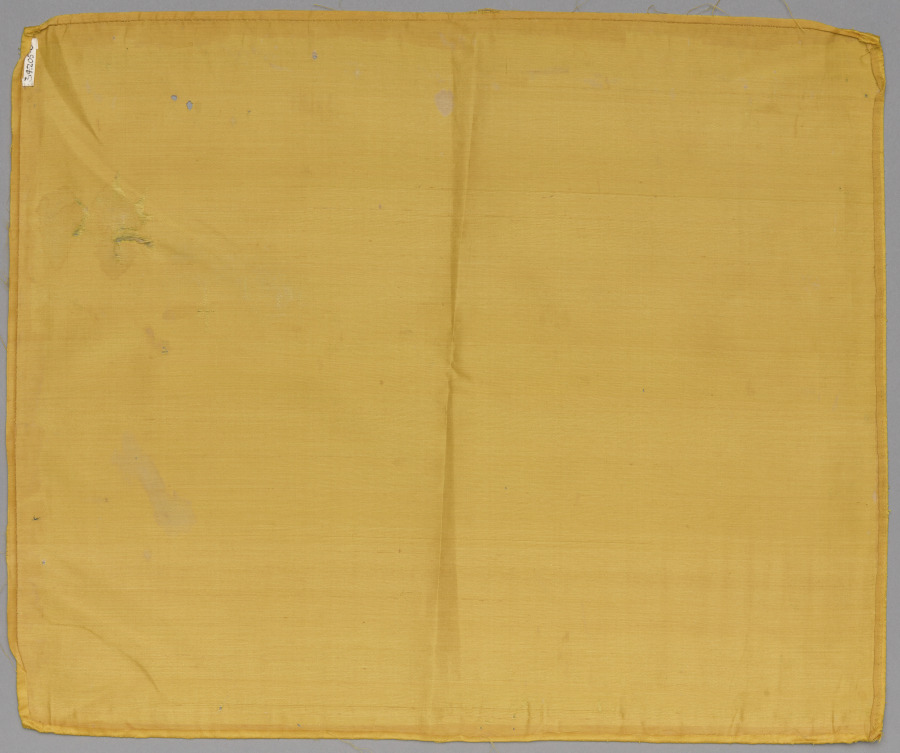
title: Cushion Cover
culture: China, Qing dynasty (1644-1911)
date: 1700s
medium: silk, metallic thread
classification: Textile